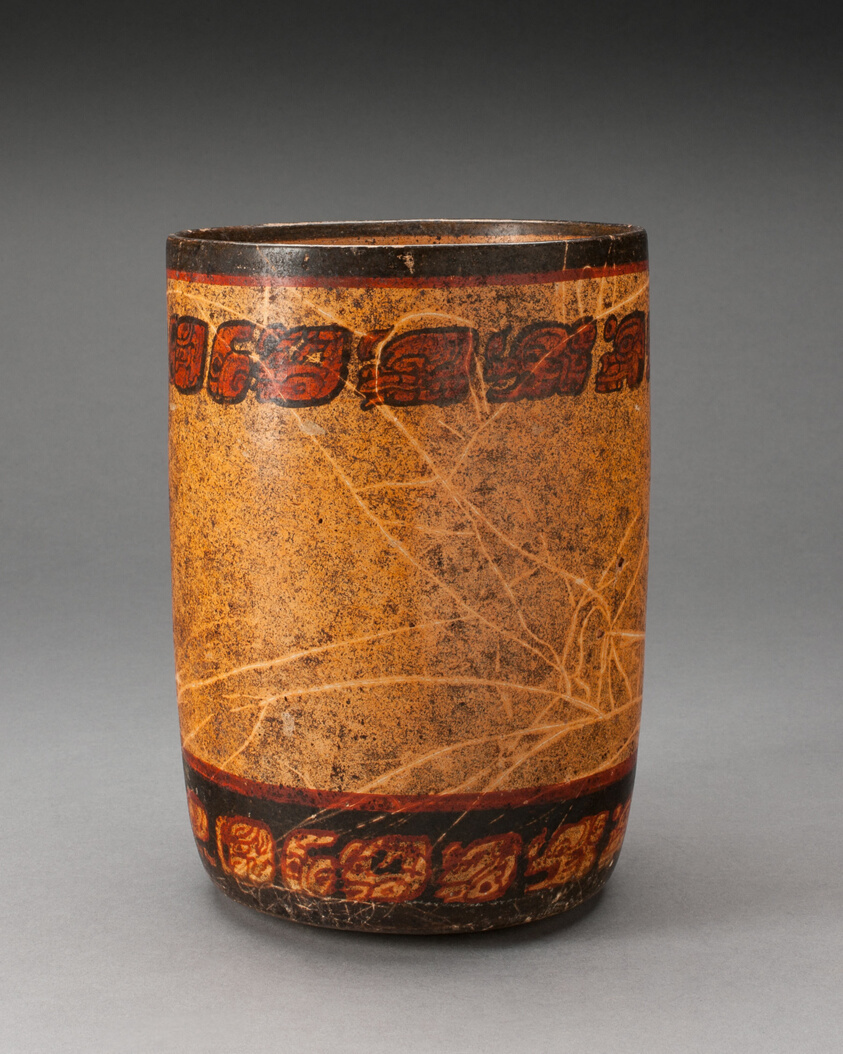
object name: Vessel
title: Cylindrical Vessel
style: maya, mayan, americas, Arts of the Americas, mesoamerican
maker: Maya (Mexico or Guatemala)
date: 250–900 CE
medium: Ceramic and pigment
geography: Mexico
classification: earthenware; art of the americas; ceramics; vessel